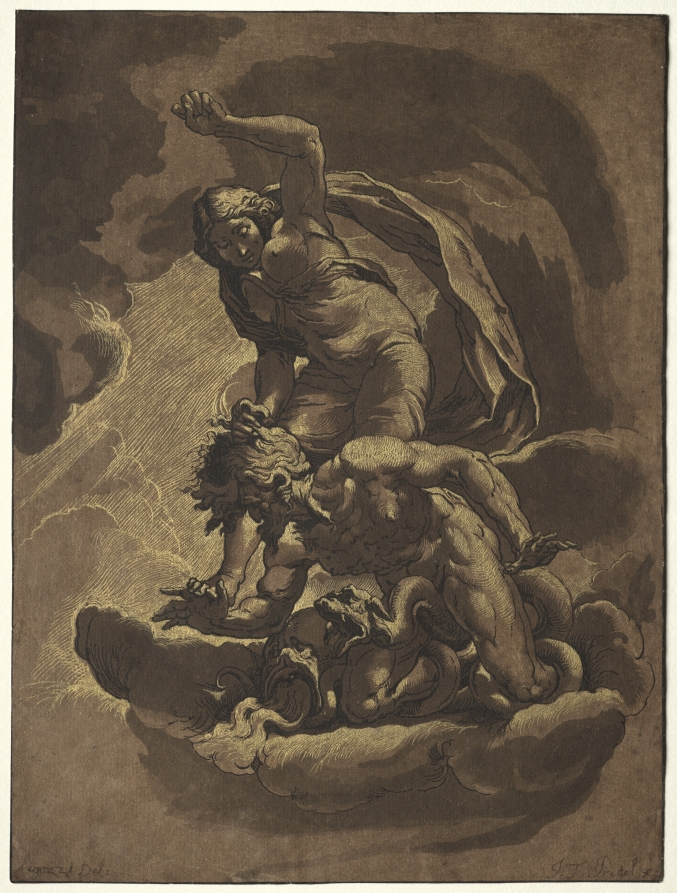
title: The Triumph of Truth over Envy, Plate 24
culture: Germany, 18th century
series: Drawings by the Best Painters of Italy, Germany, and the Netherlands, from Various Cabinets (known as the Kleine Kabinett)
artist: Maria Catharina Prestel (German, 1747–1794)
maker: after Jacopo Ligozzi (Italian, 1547-1627)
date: 1781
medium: Etching and aquatint printed in brown ink with gold leaf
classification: Print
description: As drawings became increasingly sought-after items by collectors in the 1700s, enterprising printmakers created ever-more convincing reproductions for the expanding market. Aquatint, a relatively new etching technique at the time, allowed artists like Maria Catharina Prestel to more faithfully replicate the wide range of tones common in wash drawings. This is visible, for example, in the swirling clouds surrounding the raised fist of Truth. Prestel also developed a technique to translate the golden highlights of the original drawing. She printed additional inked lines to which she adhered powdered gold leaf while they were still wet.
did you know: Maria Catharina Prestel and her husband reproduced famous drawings from collections across Europe.